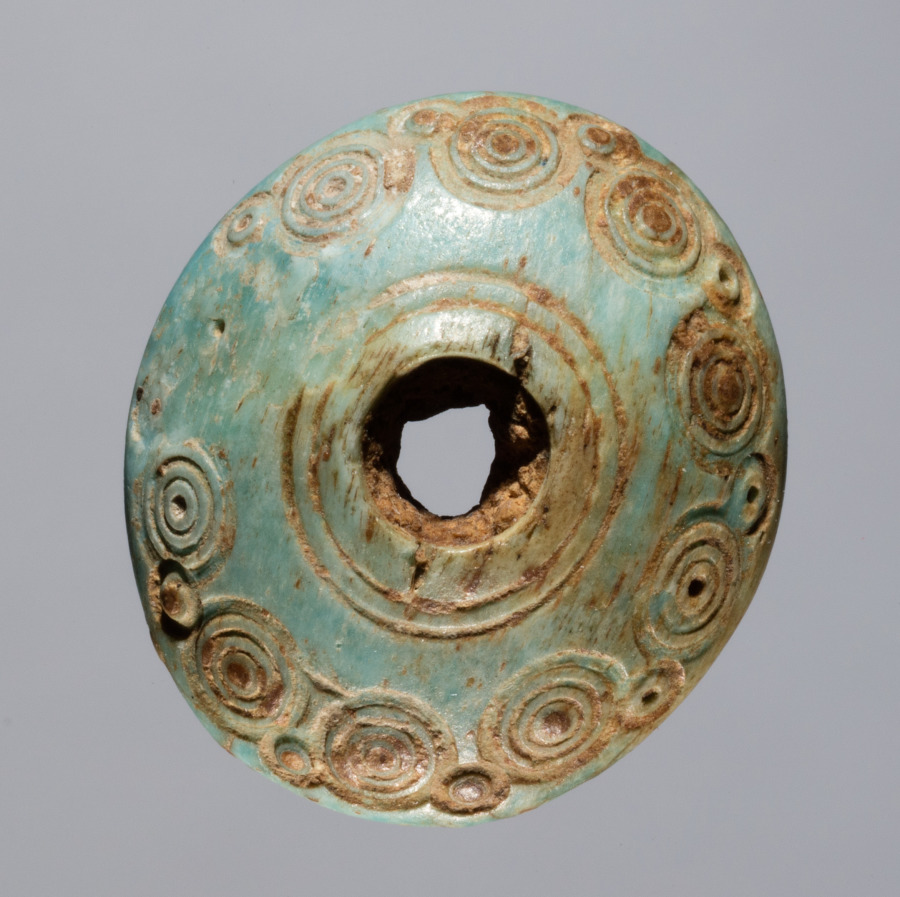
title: Spindle Whorl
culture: Iran, early Islamic period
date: 700s - 900s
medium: bone, incised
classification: Spindle Whorl